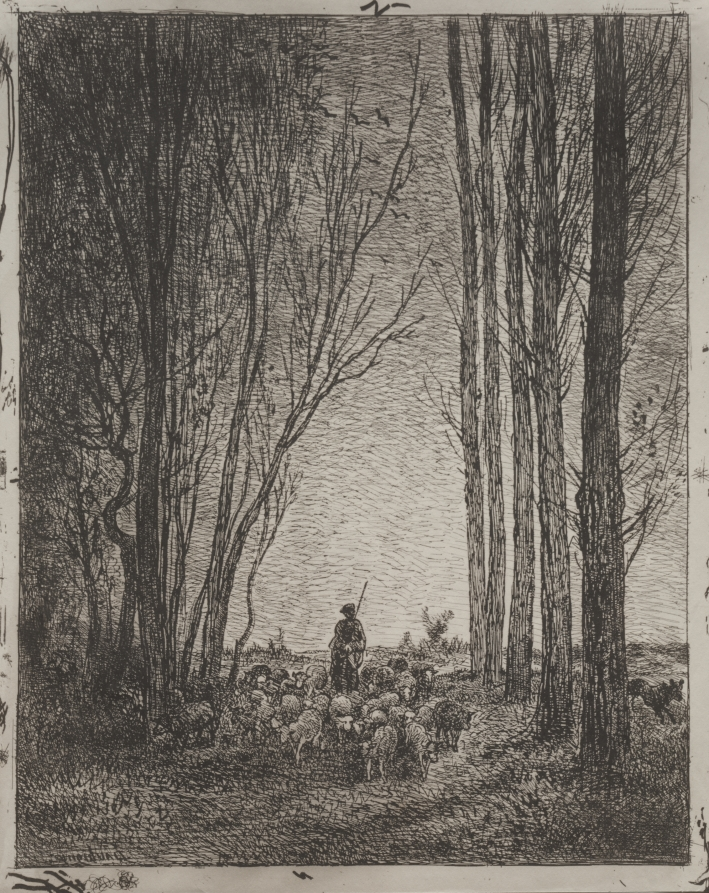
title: Gathering in the Flock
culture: France, 19th century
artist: Charles François Daubigny (French, 1817–1878)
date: original impression 1862, printed in 1921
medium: cliché-verre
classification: Print